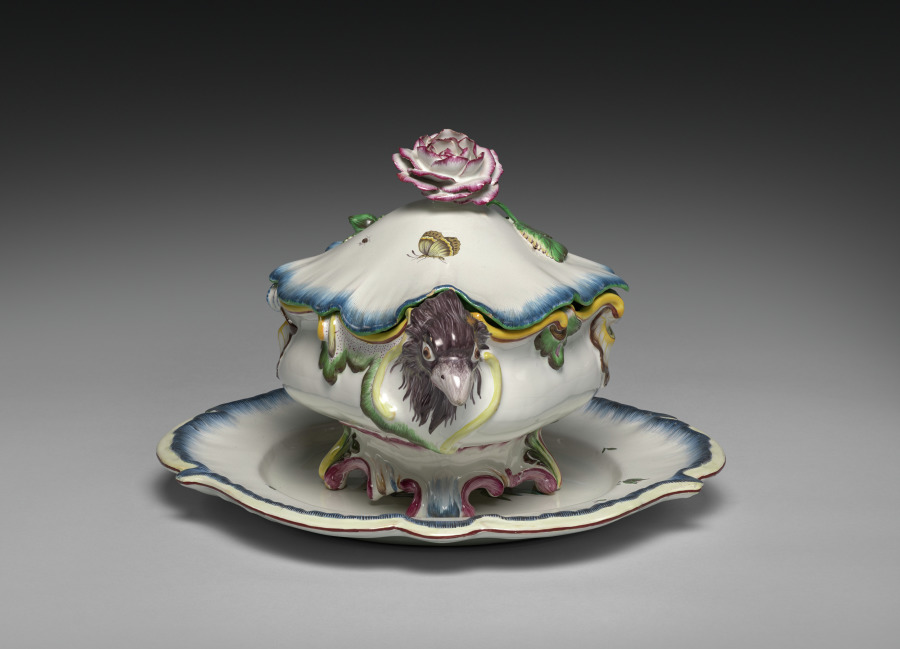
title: Covered Tureen on Stand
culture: France, Strasbourg, 18th century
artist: Strasbourg Factory (France)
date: c. 1750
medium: tin-glazed earthenware (faience) with enamel decoration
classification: Ceramic